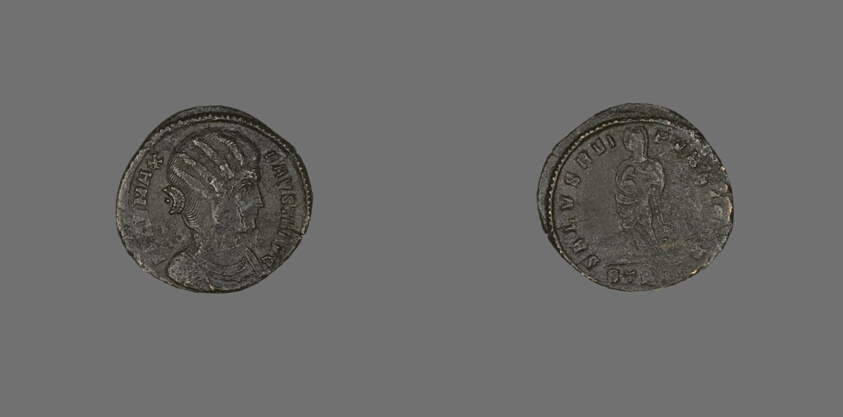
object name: Coin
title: Coin Showing Portraying Empress Fausta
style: roman (ancient, style or period), ancient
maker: Roman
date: 307-326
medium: Bronze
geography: Roman Empire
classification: coin; ancient art